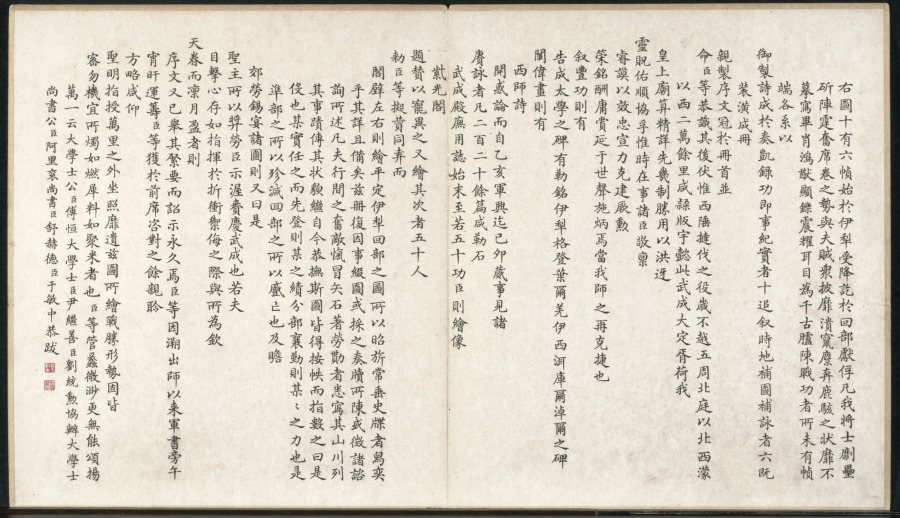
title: Battle Scenes of the Quelling of Rebellions in the Western Regions, with Imperial Poems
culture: China, Qing dynasty (1644–1911), Qianlong reign (1736–95)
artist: Giuseppe Castiglione (Italian, 1688–1766)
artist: Jean Damascene Sallusti (Italian, d. 1781)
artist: Jean Denis Attiret (French, 1702–1768)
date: c. 1765–74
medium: Etchings, mounted in album form, 16 leaves plus two additional leaves of inscriptions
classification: Print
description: This set of etchings was commissioned by Emperor Qianlong to record in pictorial terms the courage of his generals and soldiers in quelling the rebellions in the Western Regions. Qianlong added his own poem to each of the etchings, indicating his appreciation and pride in this demonstration of military might. "Western Regions" refers to the present-day Xingjiang province, often described in Western writing as "Central Asia."